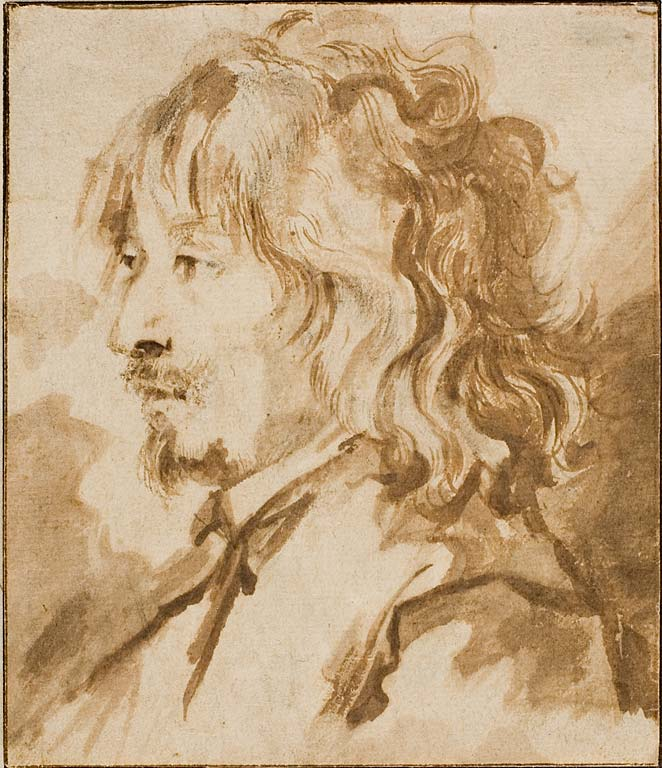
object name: Drawing and Watercolor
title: Head of a Young Man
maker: School of Anthonie van Dyck (Flemish, 1599-1641)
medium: Brush and brown wash over black chalk on buff laid paper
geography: Flanders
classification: ink or chalk wash; drawings (visual works); prints and drawing